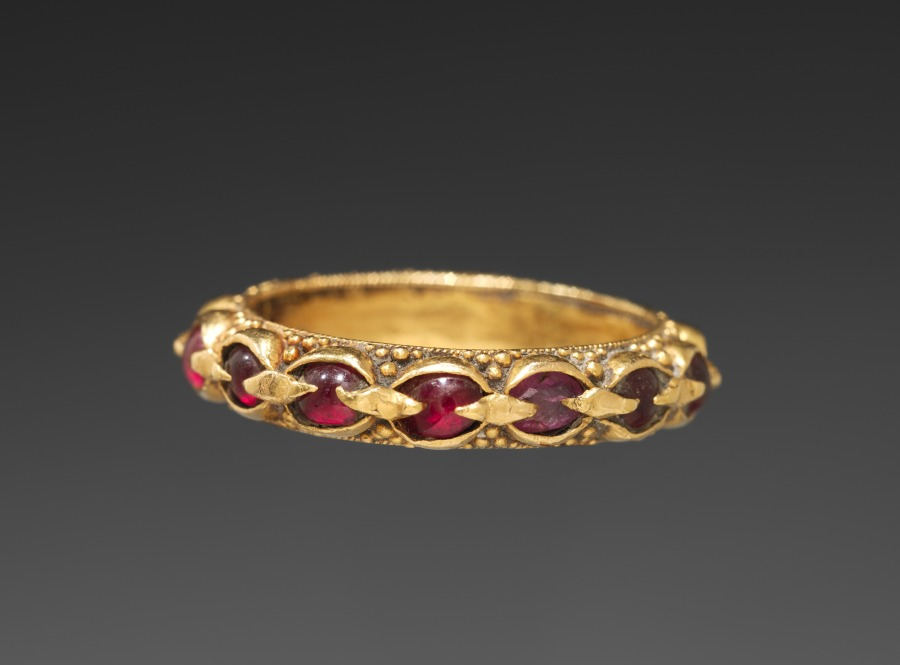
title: Ring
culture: Cambodia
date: 1800s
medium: gold with rubies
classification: Jewelry